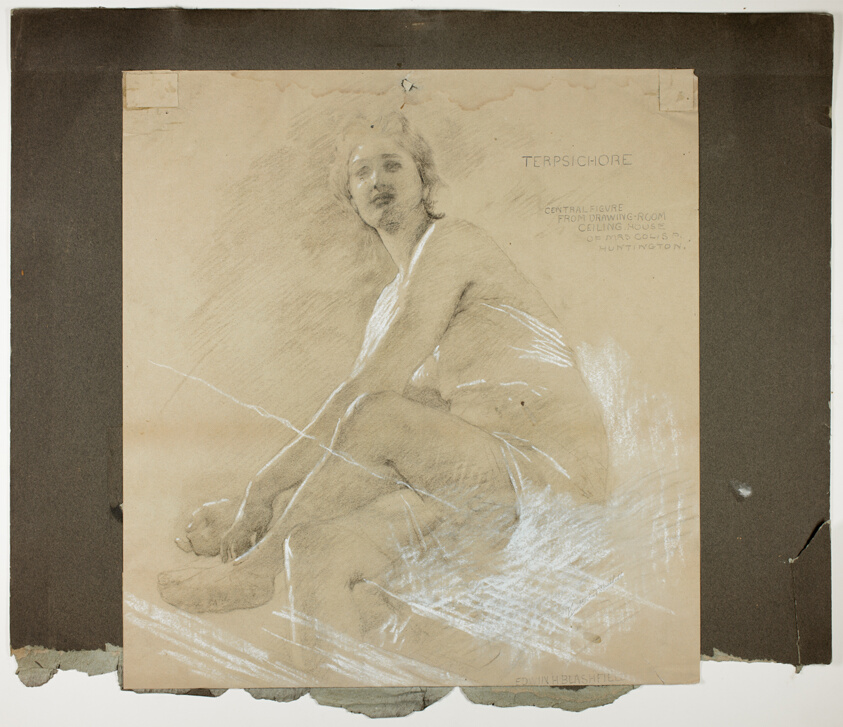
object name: Drawing and Watercolor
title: Terpsichore (recto), and Dancing Female Figure (verso), Mural Studies for Drawing Room Ceiling, Residence of Collis P. Huntington, now Yale University Art Gallery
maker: Edwin Howland Blashfield (American, 1848-1936)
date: c. 1894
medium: Charcoal with stumping and erasing, heightened with white chalk (recto), and charcoal with touches of white chalk (verso), on folded cream wove paper with blue fibers, tipped on gray wood-pulp laminate board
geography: United States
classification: drawings (visual works); prints and drawing